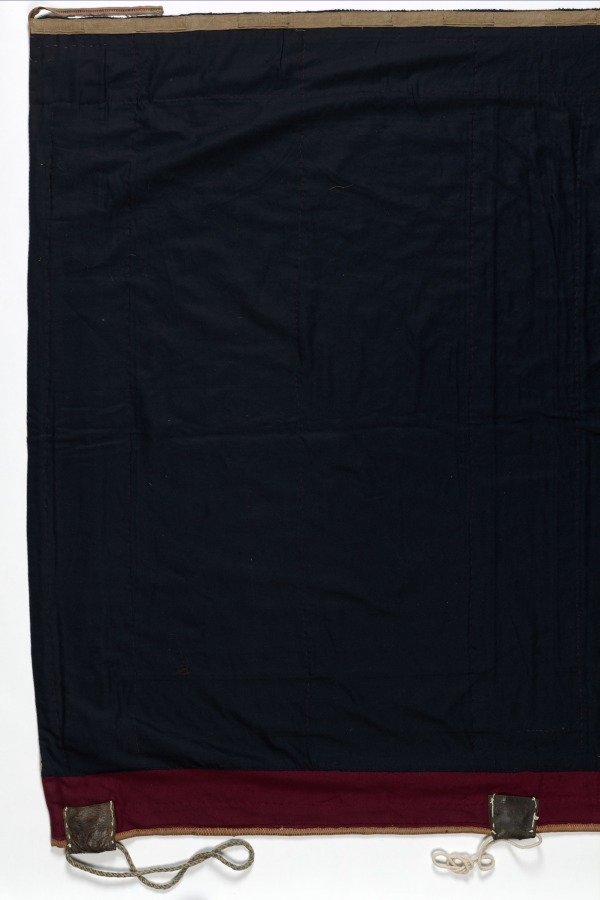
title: Royal Round Tent made for Muhammad Shah (wall panel with three design units)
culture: Iran, Rasht, Qajar period (1779-1925)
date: 1834–48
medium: Wool with silk embroidery (chain stitch), rope, cotton, leather, tape; Rasht work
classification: Textile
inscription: Inscriptions: The central design unit of this wall panel has two embroidered inscriptions. 1. Upper inscription (center of the top blossom): "Muhammad shah sultan-e ghazi."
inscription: 2. Lower inscription (on the base of the vase): "Kamtarin bandeh-ye dargah fath'ali."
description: Royal tents were potent symbols of authority, wealth, and power throughout the greater Middle East. Rulers owned thousands of tents. They were used for shelter, shade, and innumerable functions in tent compounds that were essential for imperial ceremonies, travel, and military campaigns. Distinguished by size with elaborately decorated interior walls and ceilings, tents could be as large as castles. Opulent tents were also presented as imperial gifts. Tents are only known through documents before 1600. For example, in Baghdad in 809, Caliph Harun al-Rashid owned 4,000 ceremonial tents and 150,000 camping tents that were stored in the imperial Abbasid treasury. An astonishing variety and quantity of tents were housed in the royal Fatimid tent storeroom in Cairo in 1068-69, including "military tents, fortress tents, and castle tents, manufactured of . . . gold-brocaded stuff embroidered with designs of elephants, wild beasts, horses, peacocks, birds." Since 1600, Ottoman Turkish tents with elaborate floral decoration have been preserved in Istanbul in the Topkapi Palace Museum and Military Museum, and in European collections as war booty, primarily from the Ottoman Turks' attempt to conquer Vienna in 1683. These tents are not done in the Rasht technique, but rather are applique. In contrast, royal tents from Iran are extremely rare. This spectacular ceremonial tent is embroidered with the name of its owner, Muhammad Shah, who ruled Iran from 1834 to 1848 during the Qajar dynasty. The radiant jewellike interior features exuberant flora, blossoming vines, and robust birds made with colored wool embellished with silk-thread embroidery.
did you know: Rasht work is named after the city on the Caspian Sea in present-day Iran, which was a major silk trade center with numerous textile workshops.